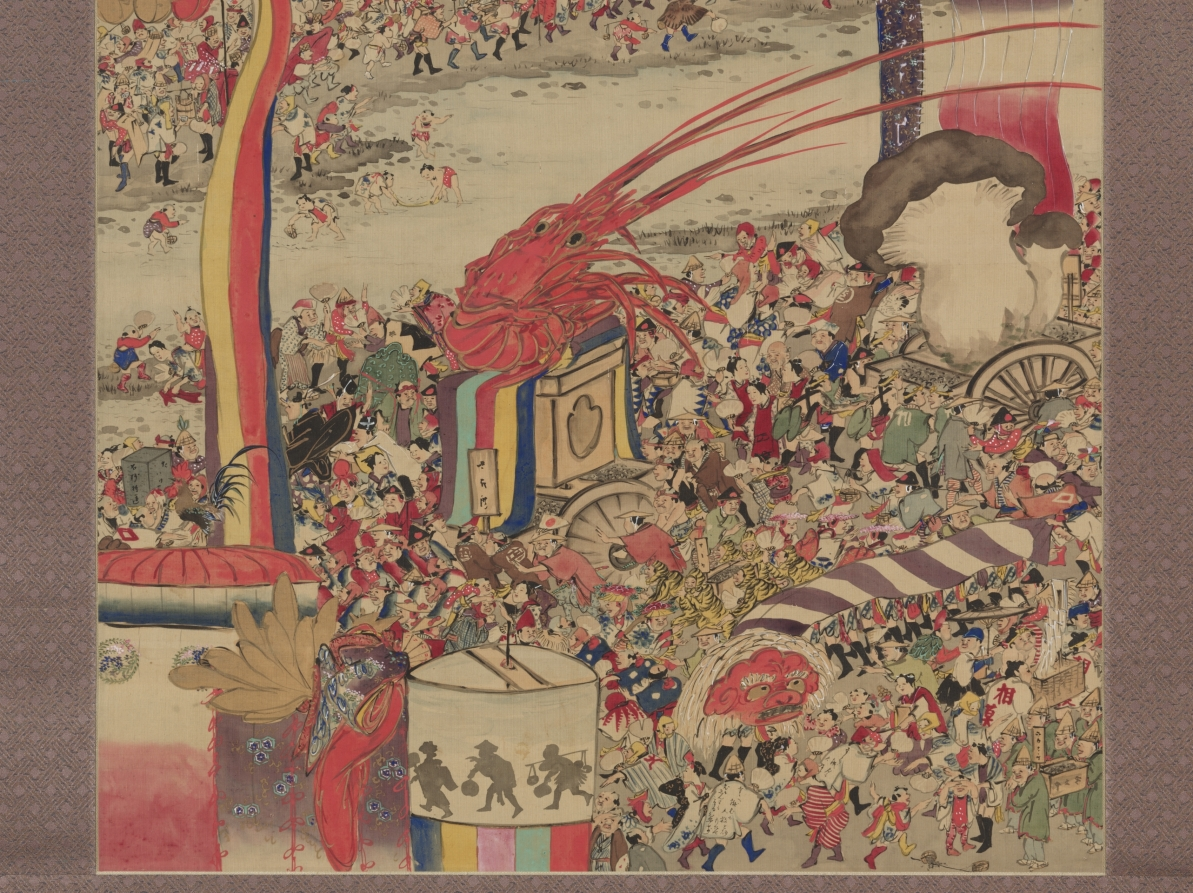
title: The Sand-Carrying Festival (Sunamochi Matsuri)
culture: Japan, Edo period (1615–1868)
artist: Sakai Basai (Japanese, dates unknown)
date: 1856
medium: hanging scroll; ink and color on silk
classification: Painting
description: Dredging waterways to preserve their function once required the cooperation of large numbers of people, seen at the top of this painting. Sand-carrying festivals were historically associated with religious rites or gathering alms to construct places of worship, and involved not only the labor of collecting sand from rivers but also parades and performances marking the event. Kyoto’s Kamo River has been dredged many times over the centuries, including in 1856, the year this image was made. Although the title at the upper right says Taihei Kakan, or “Peaceful, Beautiful View,” the painter’s delightful scene reminds his audience that at the best of times, peace may have little to do with quiet. Sakai Baisai was a student of literati painter Yamamoto Baiitsu (1783–1856). He was active until around 1879, when he relocated to Kobe to make his living as a design painter on porcelains destined for export.